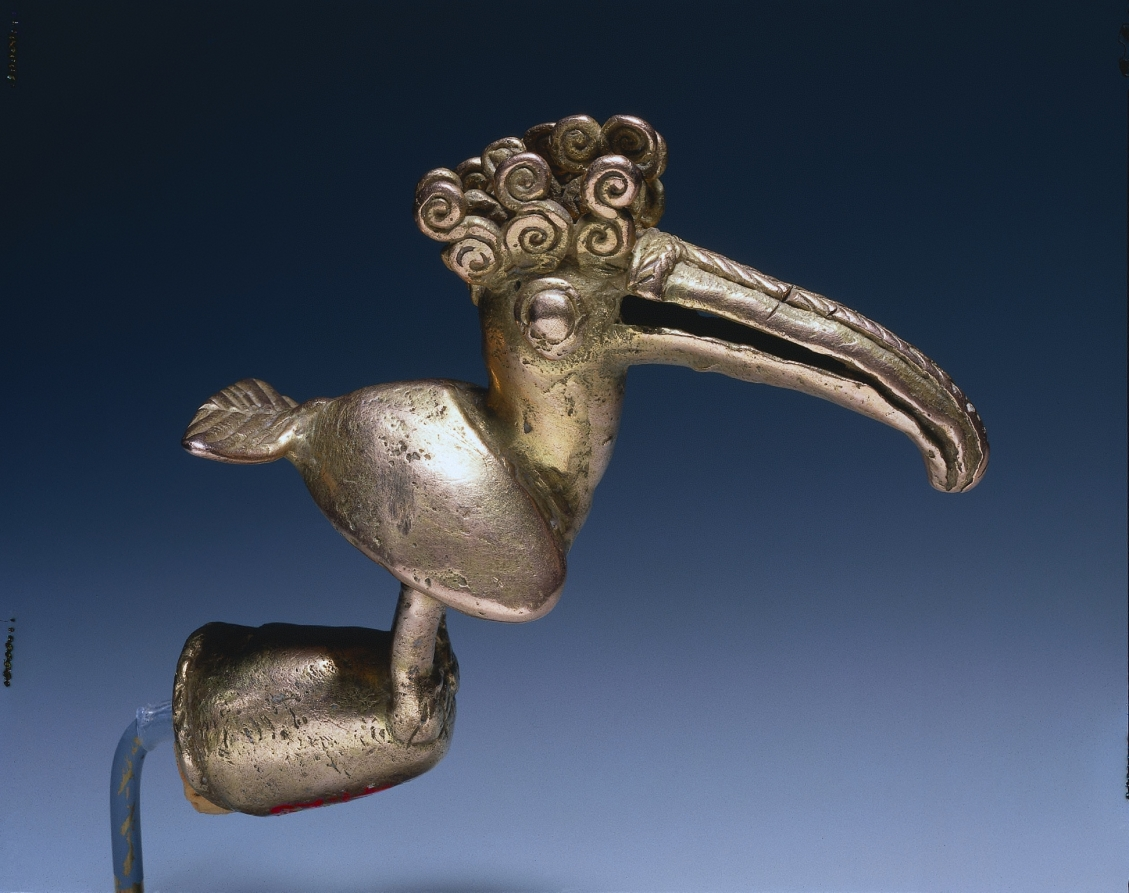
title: Staff Head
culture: Colombia, Sinú style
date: 400–1000 CE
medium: cast gold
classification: Metalwork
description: These finials probably fit over the ends of wooden staffs, emblems of rank. Unique to the Sinú area are finials with an image, often a bird, at a right angle to the base. This orientation suggests that the finials served as the finger grips of ceremonial spear throwers.